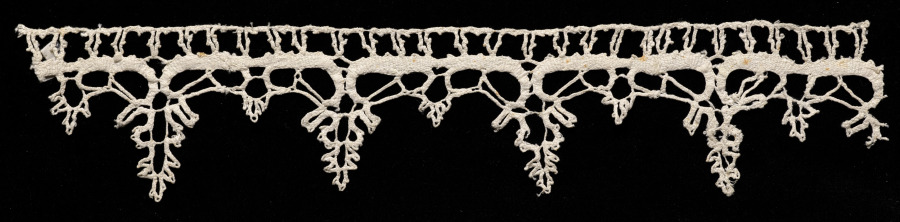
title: Lace Edging of Points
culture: Italy, Venice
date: 1500s–1600s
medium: Bobbin lace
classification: Lace